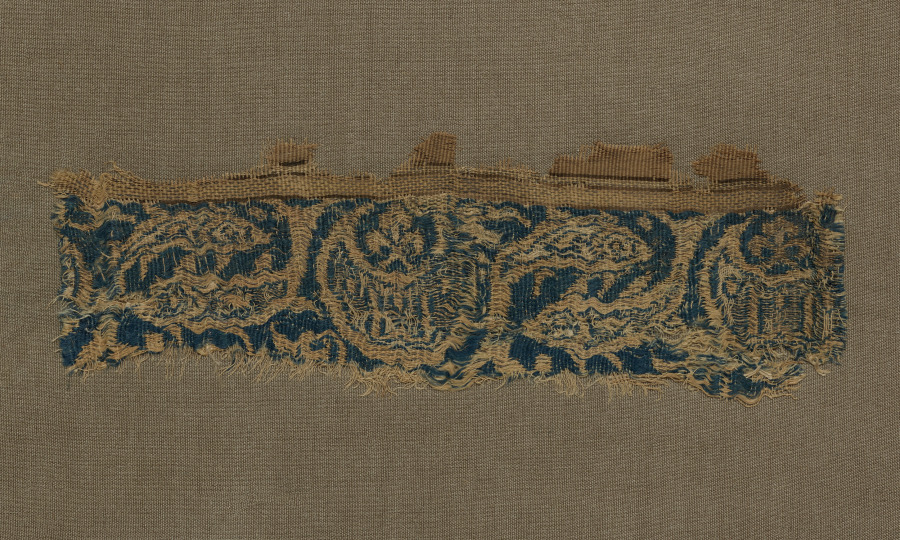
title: Fragment of a Band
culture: Egypt or Syria, Mamluk period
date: 1300–1350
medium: compound tabby, double cloth, and bands of extended tabby; silk and gold filé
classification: Textile